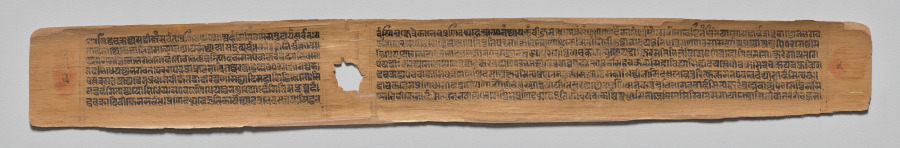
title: Folio 2 (verso), from a Great Poem about Twos (Dvyashraya Mahakavya) of Hemachandra with Commentary by Abhayatilaka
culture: Western India, Gujarat, possibly Patan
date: 1428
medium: Gum tempera and ink on palm leaf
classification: Painting